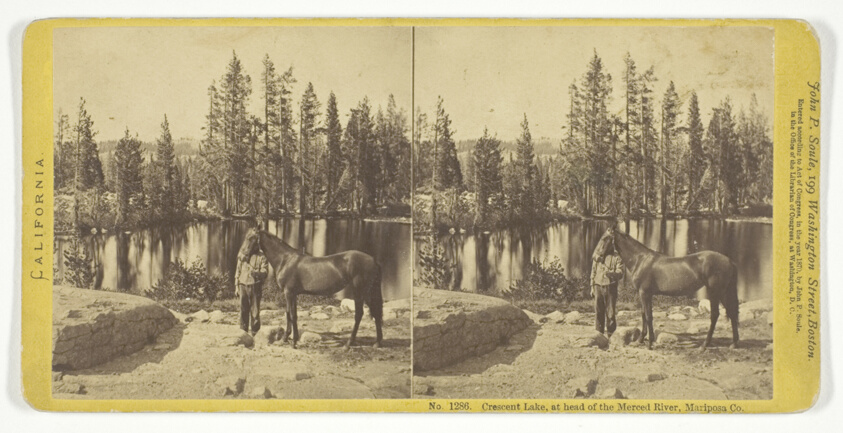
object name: Photograph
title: Crescent Lake, at head of the Merced River, Mariposa Co., stereo, No. 1286 from the series "California"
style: 19th century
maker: John P. Soule (American, 1828–1904)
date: 1870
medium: Albumen print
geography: United States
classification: stereograph (albumen); albumen silver print; photographic process; photography; photograph